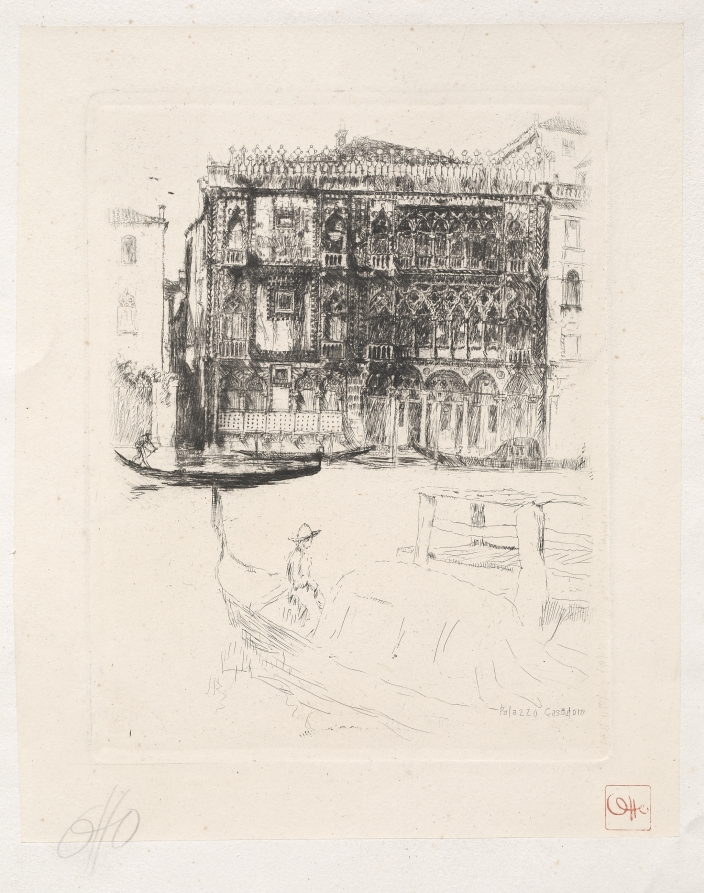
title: Cà Doro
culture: America, late 19th-early 20th century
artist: Otto H. Bacher (American, 1856–1909)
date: late 1800s–early 1900s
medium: etching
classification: Print